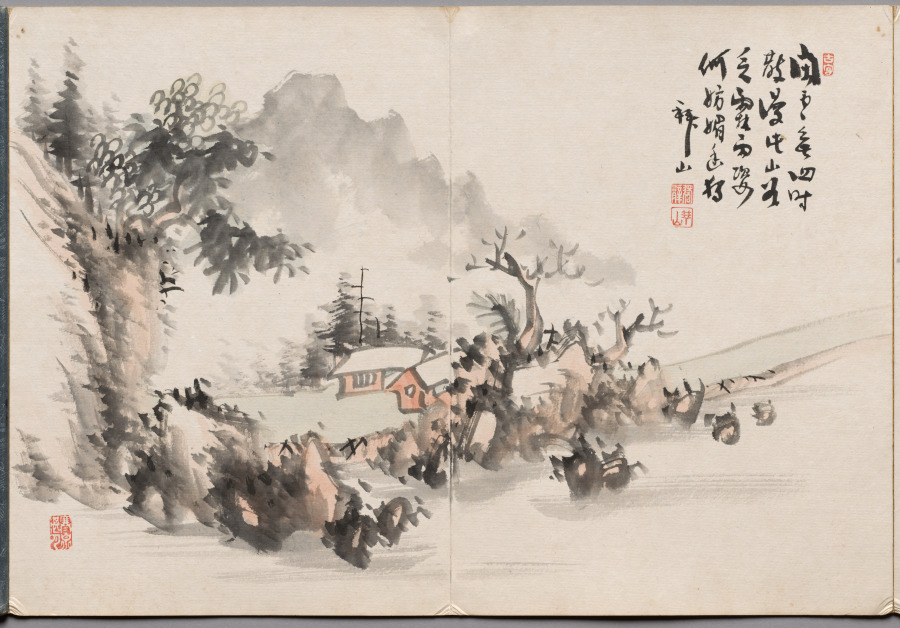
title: Painting Six from Album of Paintings by Haizan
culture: Japan, Meiji period (1868–1912) or Taishō period (1912–26)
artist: Yoshitsugu Haizan (Japanese, 1846–1915)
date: late 1800s–early 1900s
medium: page spread from double-sided accordion album; ink and color on paper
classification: Painting